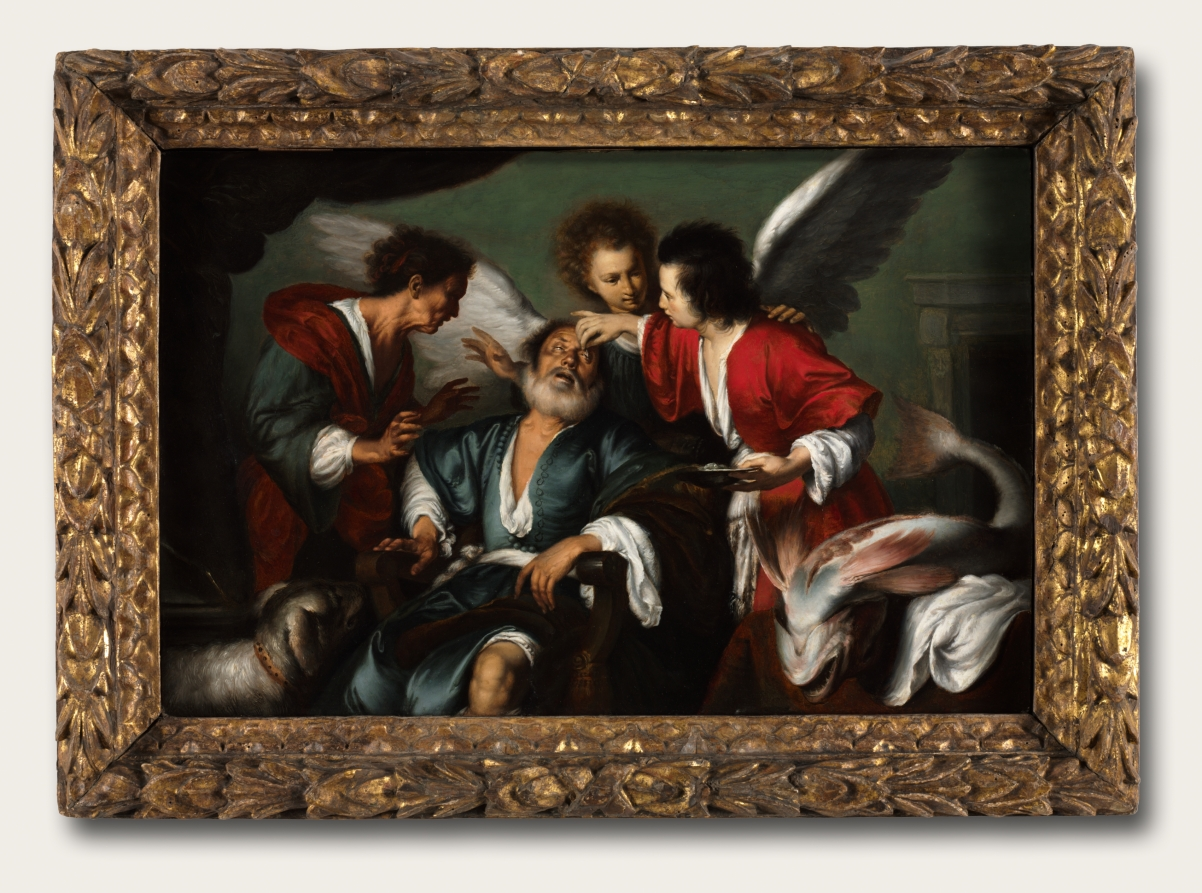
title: The Healing of Tobit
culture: Italy, 17th century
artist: Bernardo Strozzi (Italian, 1581?-1644)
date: c. 1625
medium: oil on wood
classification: Painting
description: This scene is the moving conclusion of the story of Tobias, the young man at the right. It addresses the themes of family devotion and trust. Tobias’s father sent him on a long journey to retrieve family money. The angel Raphael appeared as a relative, offering the traveler protection against such things as an attack by a huge fish, whose organs Tobias took on Raphael’s advice. Upon his return home, Tobias discovers his father has gone blind, and Raphael advises him to place the fish’s gallbladder on his father’s eyes to cure him. Strozzi depicts the miraculous cure and the moment in which Raphael reveals that he is an angel.